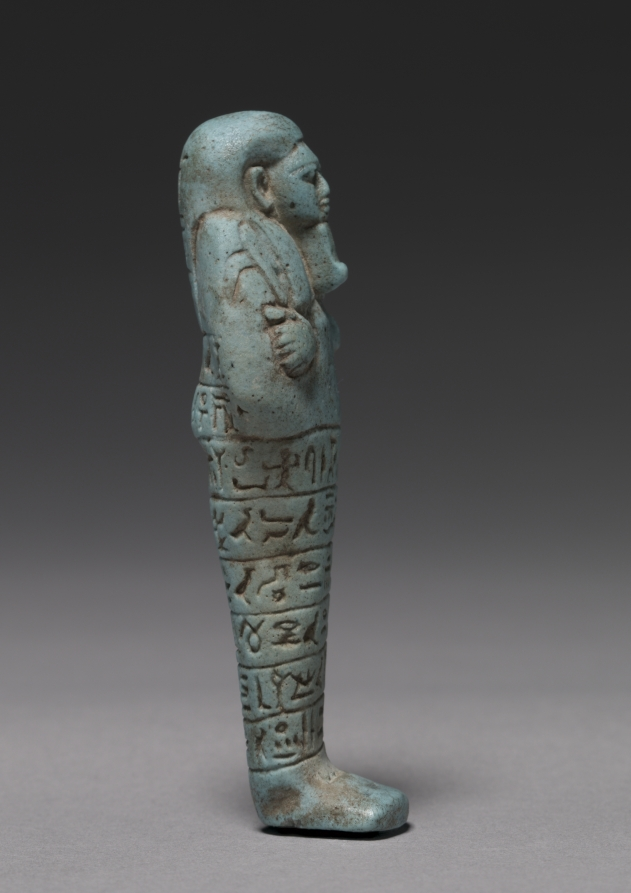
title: Shawabty of Ankh-Hor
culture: Egypt, Thebes, Late Period, Dynasty 26, reign of Psammetichus II-Apries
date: 595–586 BCE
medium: pale turquoise, vitreous Egyptian blue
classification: Funerary Equipment